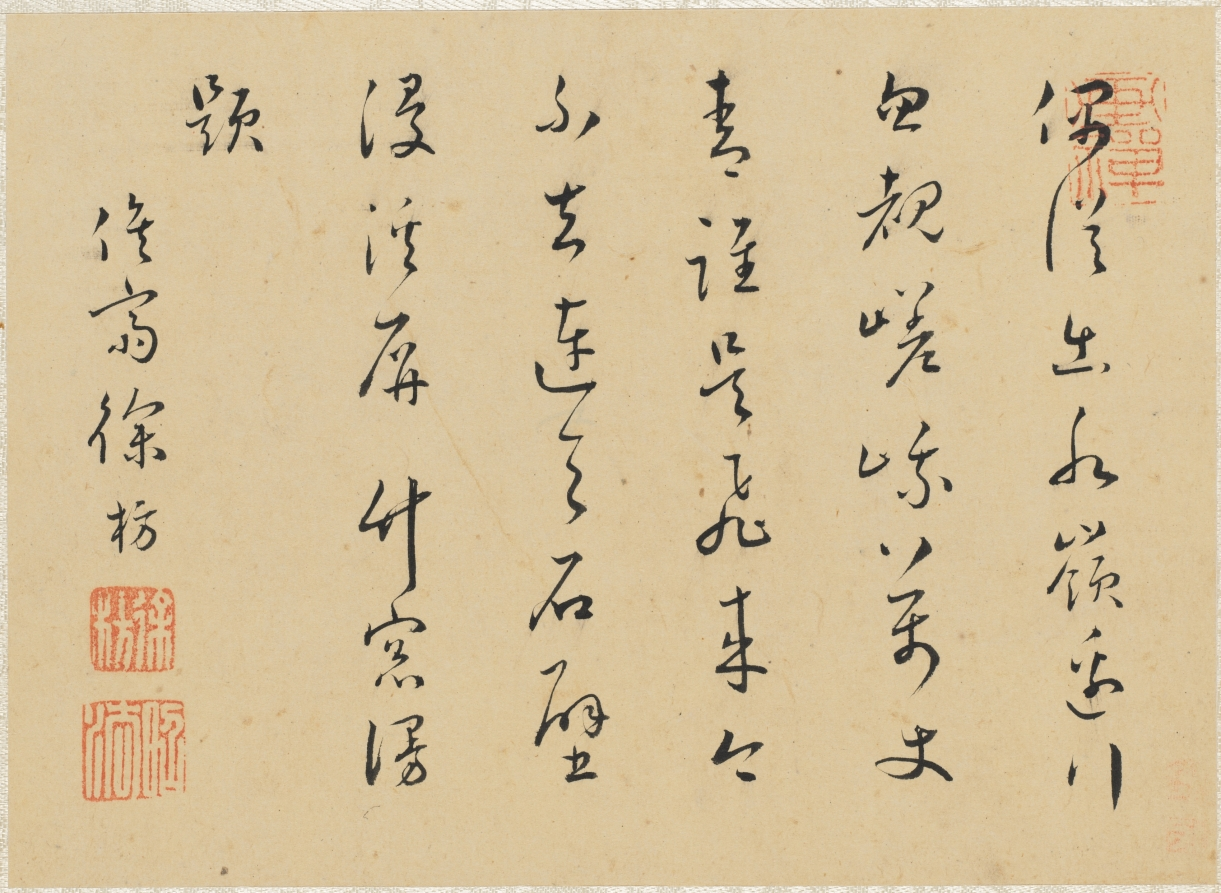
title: Album of Miscellaneous Subjects, Leaf 4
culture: China, Qing dynasty (1644-1911)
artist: Fan Qi (Chinese, 1616–after 1694)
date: early 1650s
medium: album leaf, ink and color on silk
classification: Painting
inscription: Artist seal: Fan Qi 樊圻. Poem by Xu Fang 徐枋 (1622–1694): By chance, I start my journey from the watershed to remote regions,/ Suddenly I sight the silhouette of mountains - myriad expanses of green./ What is this "Come-flying" Peak which now does not recede,/ Its rocky walls, linked to heaven, are drenched by a waterfall.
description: The fourth painting by Fan Qi alludes to Wang Wei's poetic lines: In empty hills, there is no one there; Yet one can hear the sound of conversation. The calligraphic colophon by Xu Fang adjacent to the painting reads: By chance, I start my journey from the watershed to remote regions, Suddenly I see the silhouette of mountains, myriad expanses of green. What is this Feilai Peak which now does not recede? Its rocky walls, linked to heaven, are drenched by a waterfall.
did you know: There is no sign of human presence in this sunny landscape dominated by a bold flat-topped cliff.